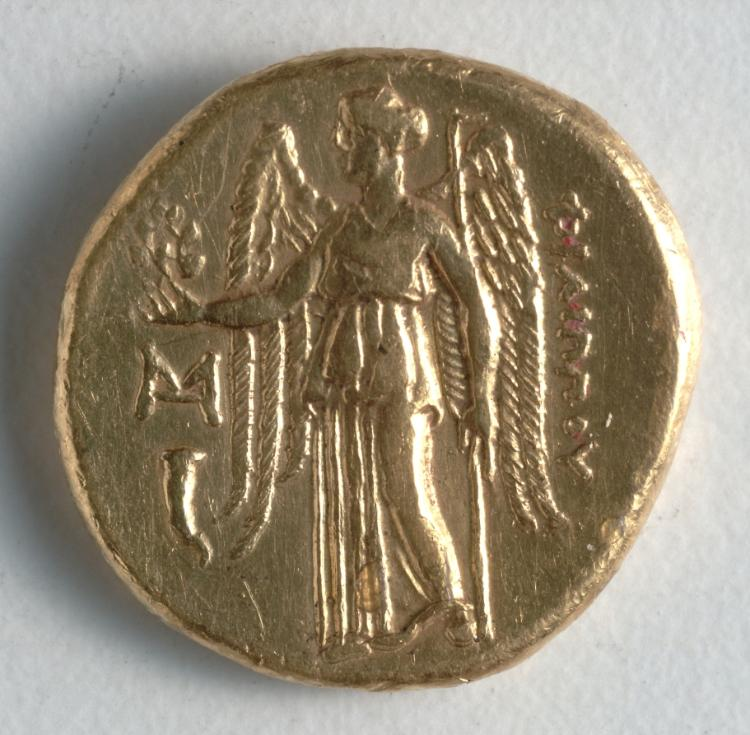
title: Stater: Nike (reverse)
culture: Greek, Macedonian, minted at Abydos (Mysia), reign of Philip III Arrhidaios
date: 323–317 BCE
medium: gold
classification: Coins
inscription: ΦΙΛΙΠΠΟΥ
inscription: - within M